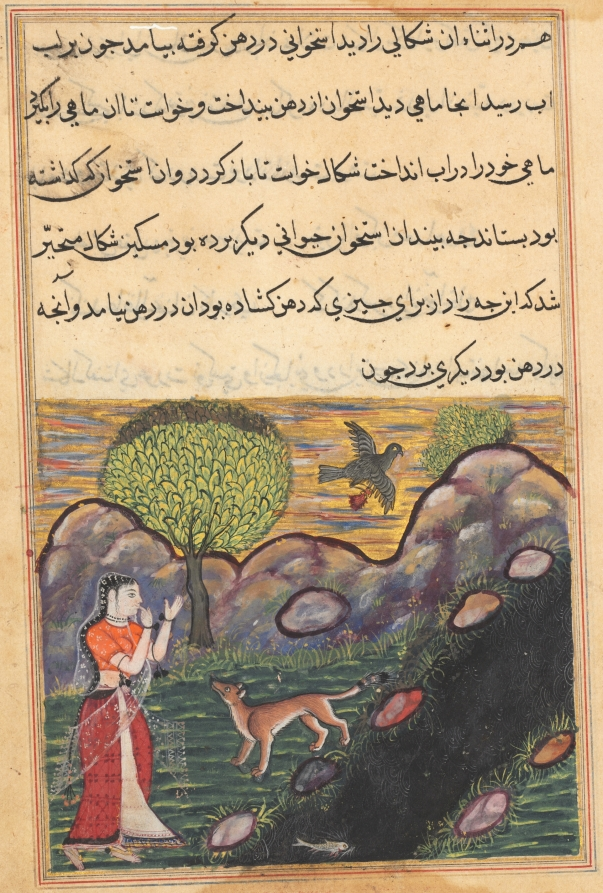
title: The daughter-in-law of the king of Banaras sees the jackal deprived of its food by a bird, as it unsuccessfully attempts to catch a fish, from a Tuti-nama (Tales of a Parrot): Sixteenth Night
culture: Mughal India, court of Akbar (reigned 1556–1605)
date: c. 1560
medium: gum tempera, ink, and gold on paper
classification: Painting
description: Having been left alone in the wilderness by her lover, the woman comes across the jackal who has just lost its meal. The wise jackal counsels her on the importance of satisfaction and instructs her to return to her husband. Above them, a large bird flies away with the jackal’s food gripped in its feet.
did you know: The fish that the jackal was trying to catch is visible in the stream.